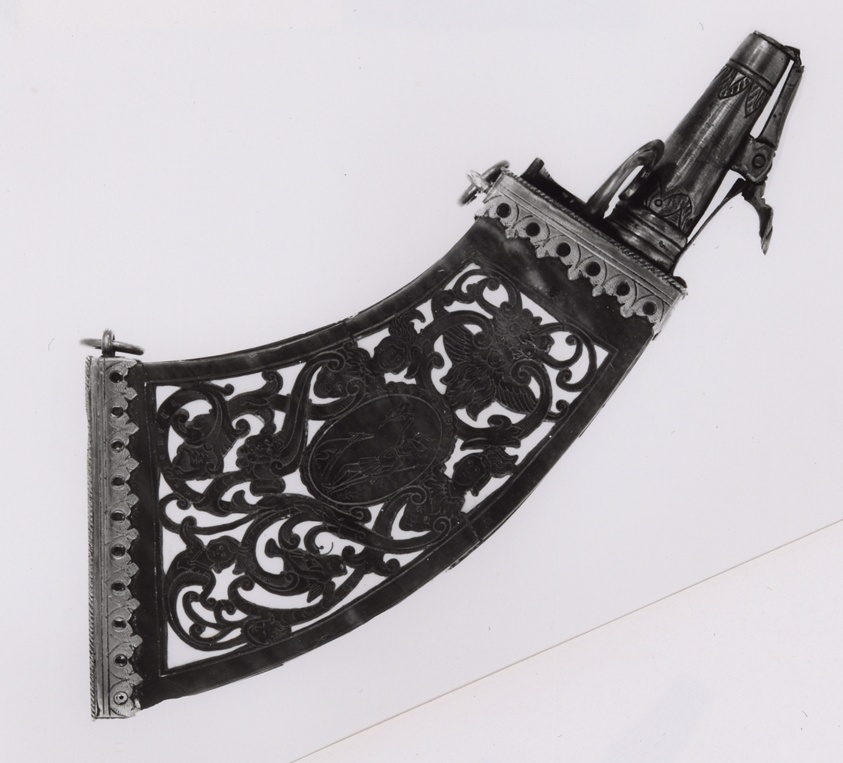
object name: Arms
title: Powder Flask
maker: German; possibly Munich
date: 1610/40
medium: Gilt brass, tortoiseshell, and ivory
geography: Munich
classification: firearm-accessory; arms; arms and armor